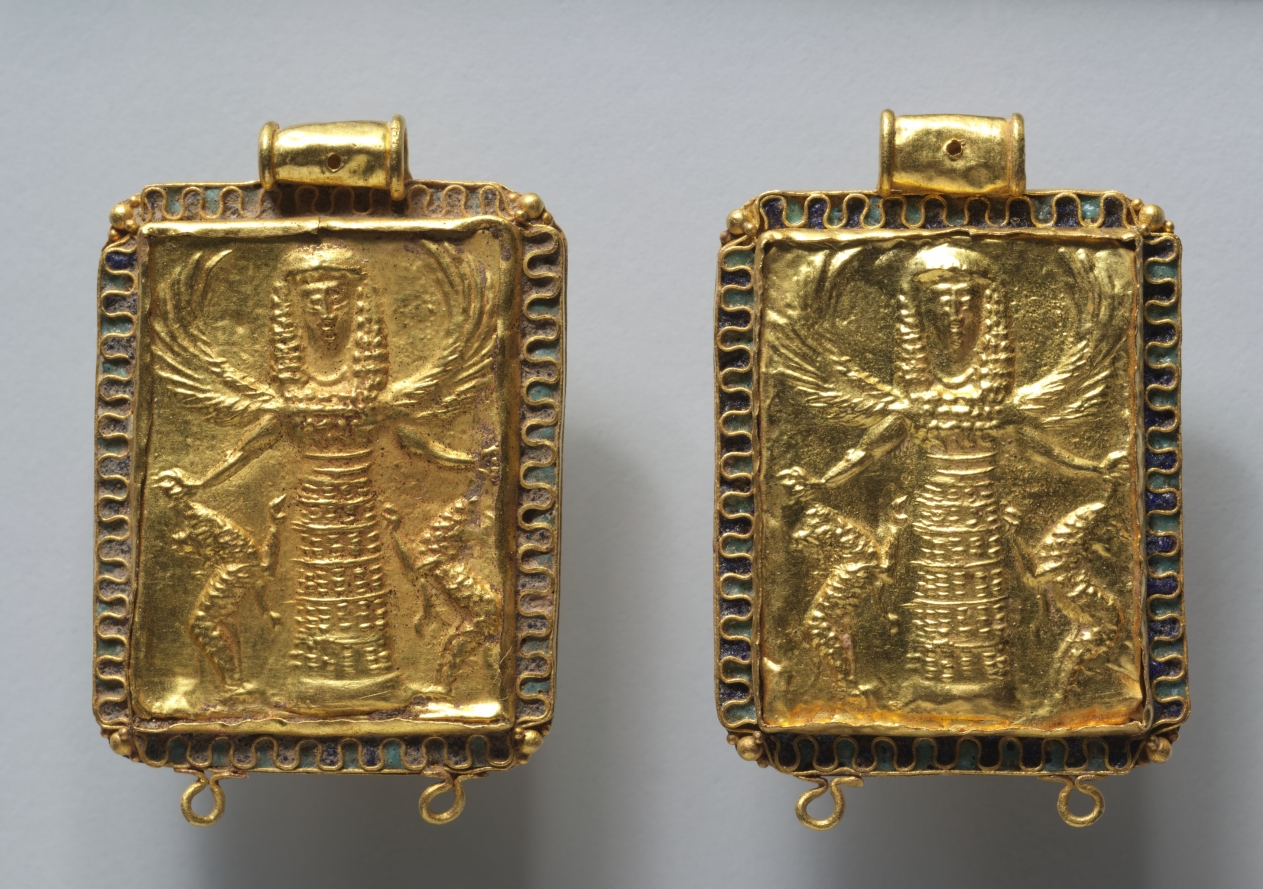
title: Daedalic Pendant with Potnia Theron (Mistress of Animals)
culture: Eastern Greece, Rhodian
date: 650–600 BCE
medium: gold and glass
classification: Metalwork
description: This pendant shows the goddess Potnia Theron, the “mistress of the animals,” a deity sometimes associated with the Greek goddess Artemis. The goddess stands in a frontal pose with upswept wings, one curving above each shoulder. Each of her fists closes around the leash of a rearing feline. This piece is one of two nearly identical pendants in the collection (1999.88 and 2001.157) that were probably originally from the same necklace.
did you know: The small loops at the bottom of the pendants probably held chains attached to pomegranate-shaped beads.